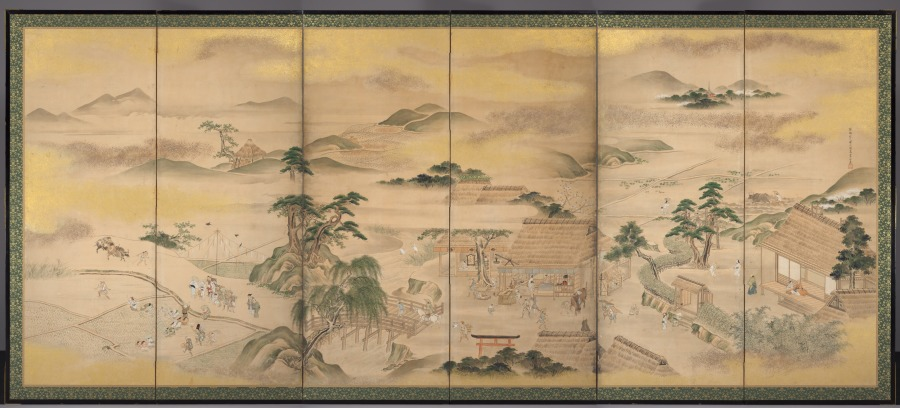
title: Spring and Autumn Farming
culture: Japan, Edo period (1615–1868)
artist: Kō Sūkoku (Japanese, 1730–1804)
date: 1700s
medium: Pair of six-panel folding screens, ink, light color, gold, and silver on paper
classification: Painting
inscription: Signature of the artist: "Enrin san jin Rakushisai ko Sukoku ga" (each screen)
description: These screens present the cycle of the farming year, starting with spring at right and ending with fall at left. Close examination of these screens reveals moments of games and amusement, the enjoyment of meals as well as intellectual and spiritual pursuits interspersed among the scenes of cultivating and preparing the rice harvest. The artist Kō Sūkoku is considered the 18th-century heir in style and attitude to Hanabusa Itchō (1652–1724). Itchō’s work incorporated elements from Kano school, ukiyo-e, and literati styles of painting. Kō trained with one of Hanabusa’s pupils, Sawaki Sūshi, who was best known for scenes depicting everyday life and customs.